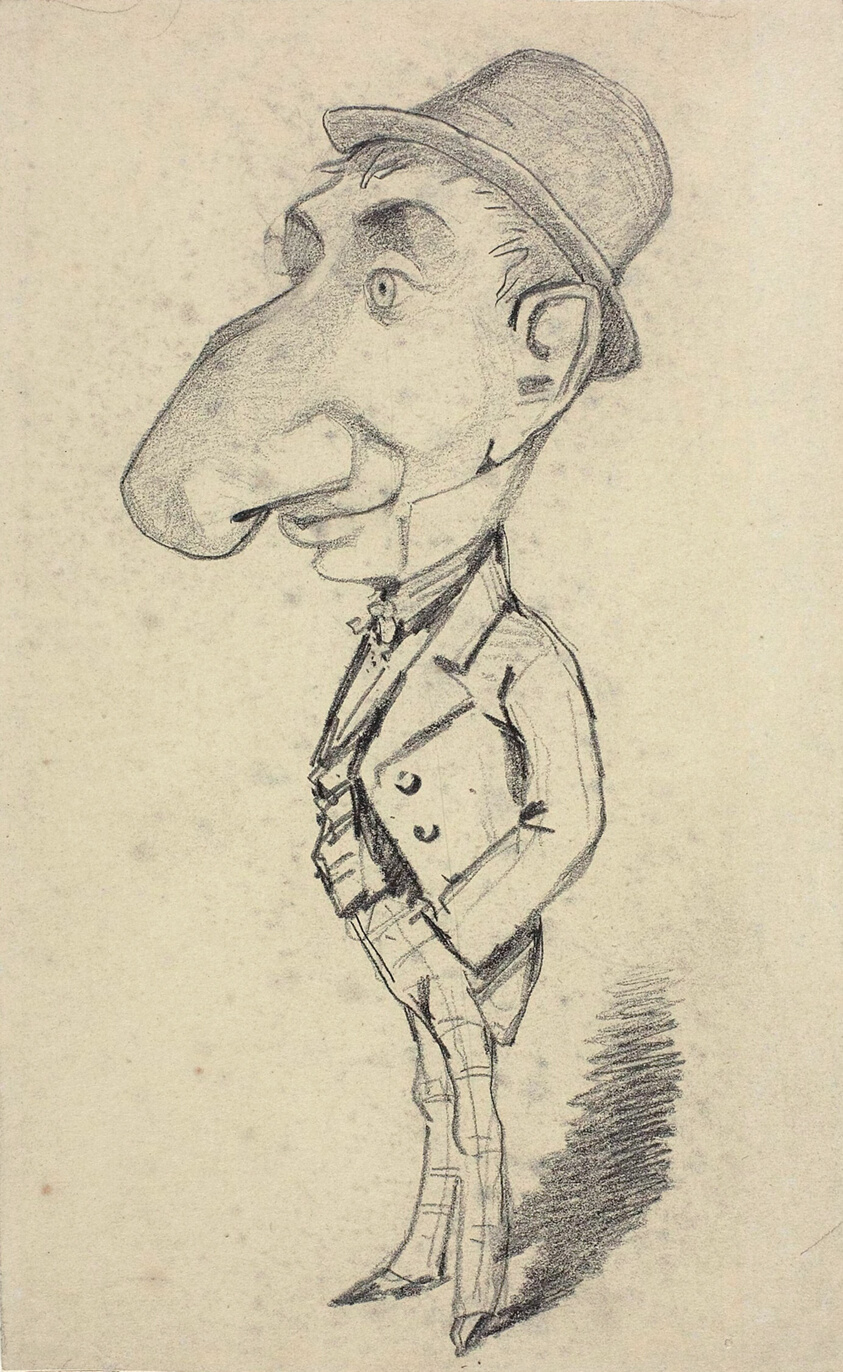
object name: Drawing and Watercolor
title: Caricature of a Man with a Large Nose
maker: Claude Monet (French, 1840-1926)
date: 1855/56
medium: Graphite on tan wove paper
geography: France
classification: graphite; drawings (visual works); prints and drawing